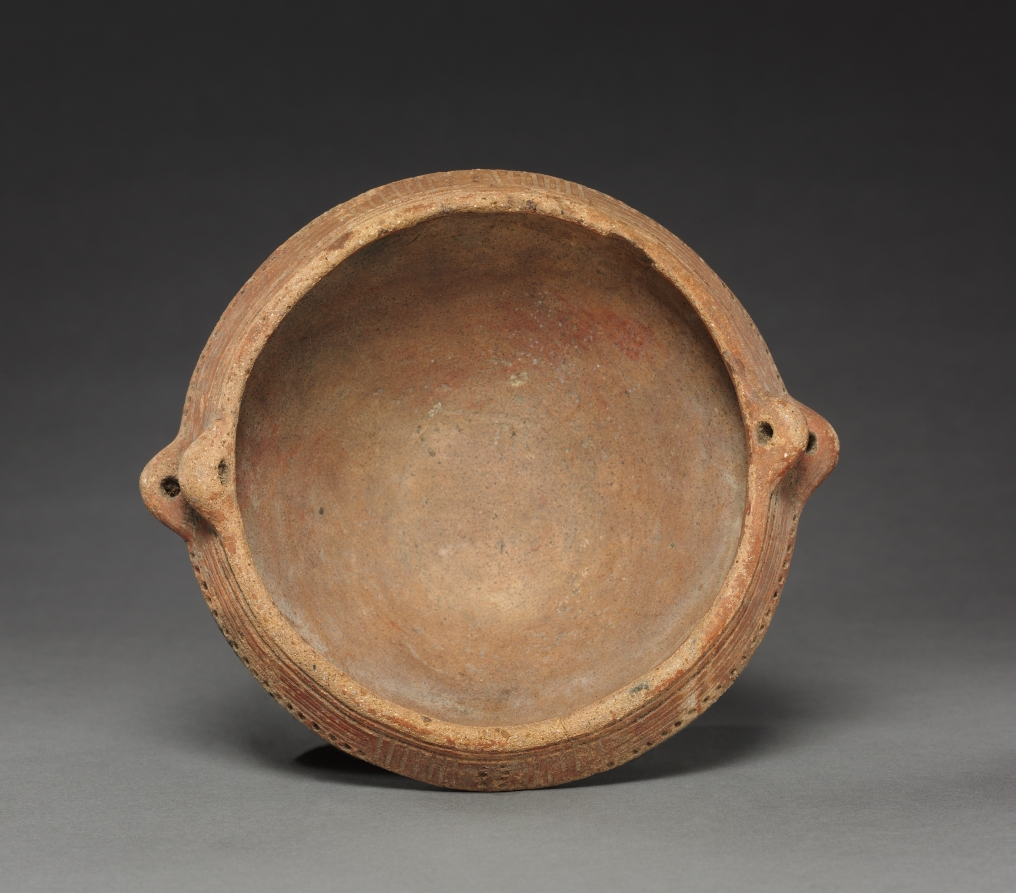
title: Jar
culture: Colombia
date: before 1550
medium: red ware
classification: Ceramic